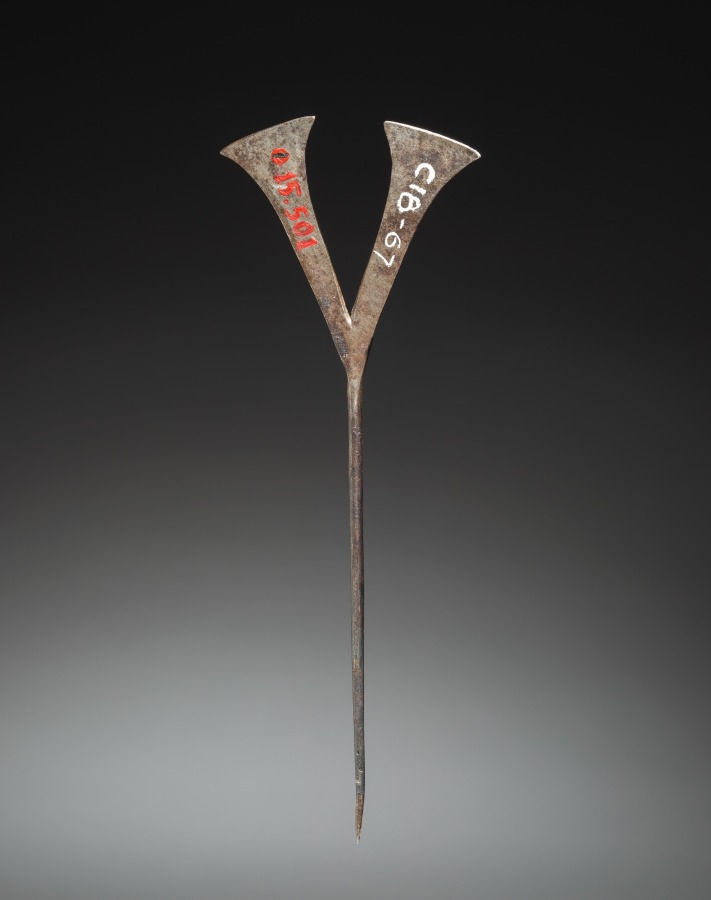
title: Hair Ornament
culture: Africa, Central Africa, Democratic Republic of Congo, Luba-style maker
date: Unassigned, before 1915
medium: Iron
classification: Jewelry